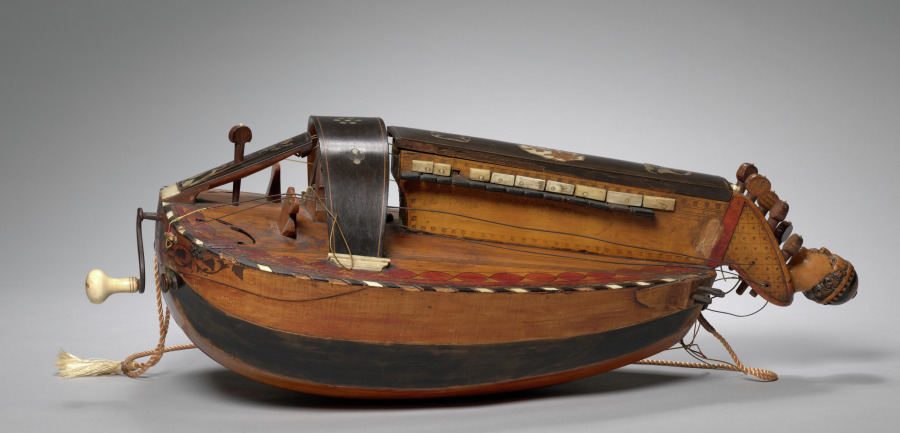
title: Vielle à Roue (Hurdy-Gurdy)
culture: France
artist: Jacques Decante (French, 1808–1884)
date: 1865–70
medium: Wood; mother-of-pearl inlay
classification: Musical Instrument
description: In France, the hurdy-gurdy is known as the vielle à roue (wheel fiddle). This six-stringed musical instrument produces sound by a hand crank-turned wheel that rubs against the strings. The wheel functions much like a violin bow, and single notes sound similar to those of a violin. Melodies are played on a keyboard that presses small wedges against the strings to change their pitch.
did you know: This vielle à roue was made in the French village of Jenzat, which was the manufacturing center for hurdy-gurdies during the 19th century.